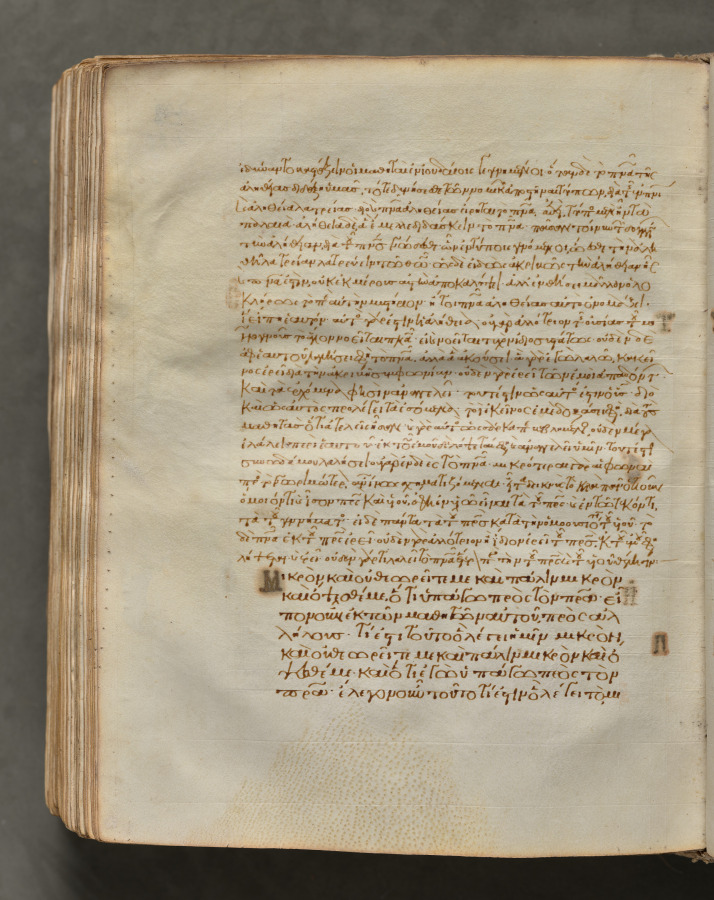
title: Text, folio 400 (verso), from a Gospel Book with Commentaries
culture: Byzantium, Constantinople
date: c. 1000–1100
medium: ink, tempera, and gold on vellum; leather binding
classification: Bound Volume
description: Each of the four gospels in this book opens on a page with brilliantly illuminated borders depicting the author of the text as well as birds—principally peacocks, symbols of the immortality of the soul—and fountains, representing the fountain of life and the salvation of the soul. This volume consists of 428 leaves with texts in Greek. Its level of sophistication suggests that it was probably written and decorated in a monastery in Constantinople.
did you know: Gospel books were carried in procession through Byzantine churches.